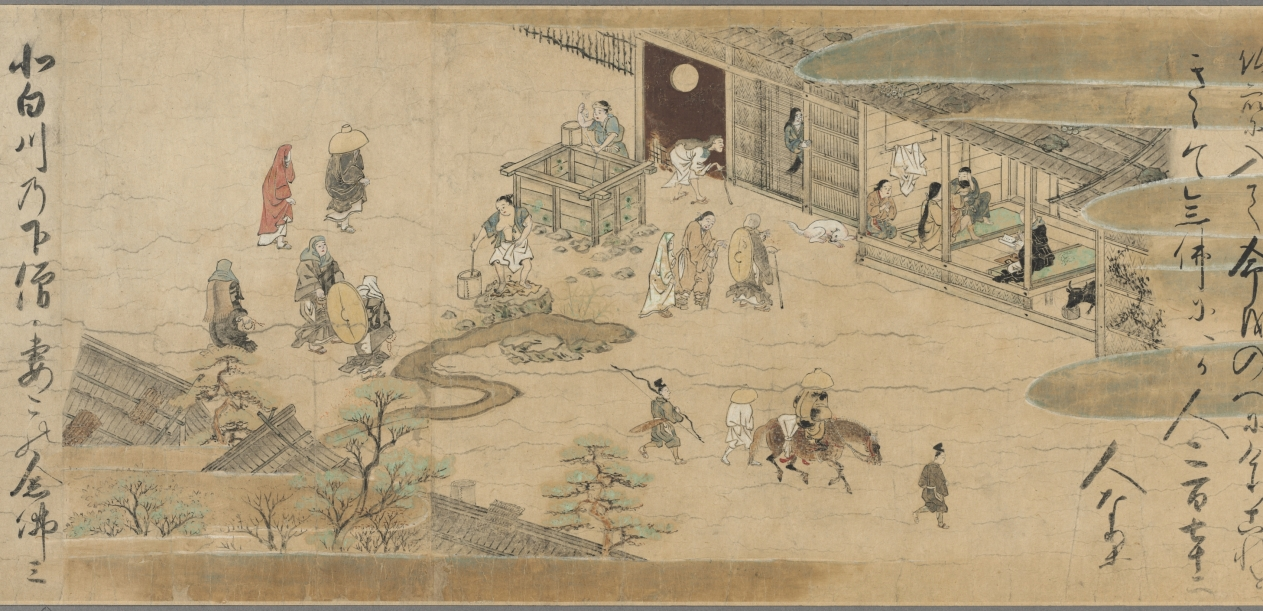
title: The Illustrated Miraculous Origins of the Yūzū Nenbutsu School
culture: Japan, Kamakura period (1185–1333)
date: early 1300s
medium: Handscroll; ink, color, and gold on paper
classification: Painting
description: This painting is the second of a set of two illustrated handscrolls. The first scroll depicts the biography of the Japanese Buddhist monk Ryōnin. This scroll begins with scenes of Ryōnin’s death and relates episodes illustrating the efficacy of following his teachings. Ryōnin asserted the total interconnectedness of all things and the spiritual benefit of chanting the name of the Buddha Amida for one another.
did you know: The other scroll from this two-scroll set belongs to the Art Institute of Chicago.